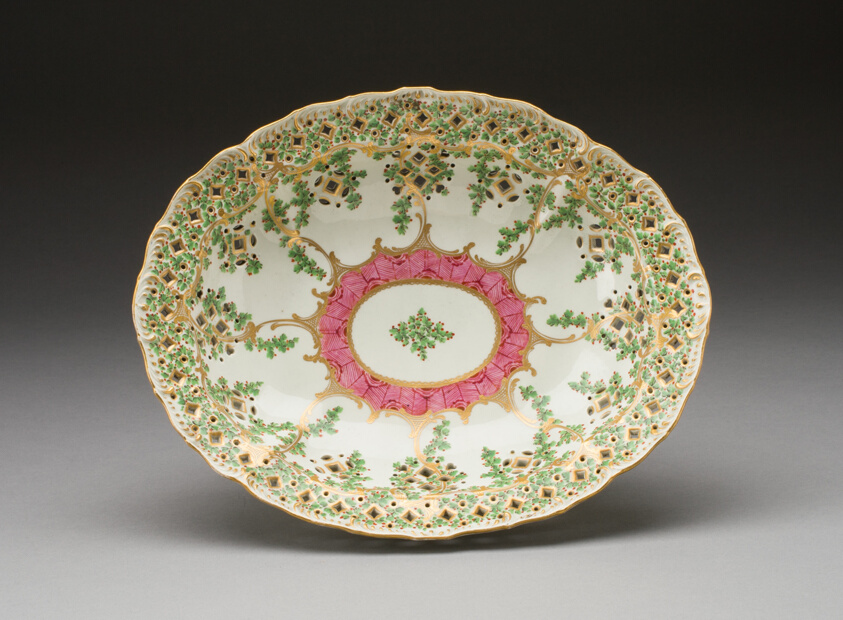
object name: Ceramics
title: Pierced Dish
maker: Worcester Porcelain Factory (Warmstry House Period, 1751–1783); Worcester, England, founded 1751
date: c. 1775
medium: Soft-paste porcelain, polychrome enamels and gilding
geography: Worcester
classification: dish (vessel); porcelain; european decorative arts; ceramics